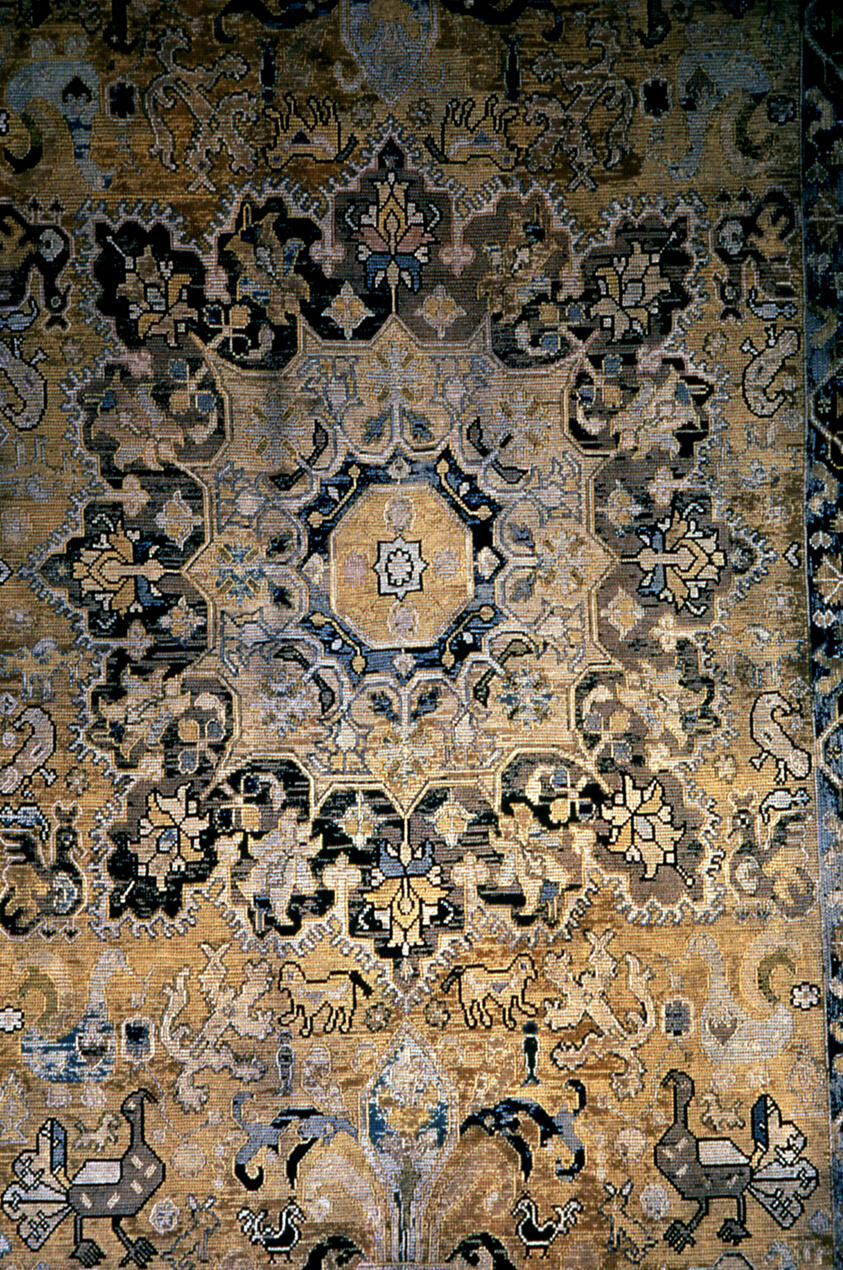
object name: Religious/Ritual Object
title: Altar Carpet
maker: Portugal, Arraiolas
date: 17th century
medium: Linen, plain weave; embroidered with wool in long-armed cross stitches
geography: Spain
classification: textile; needlework - carpet; ritual objects